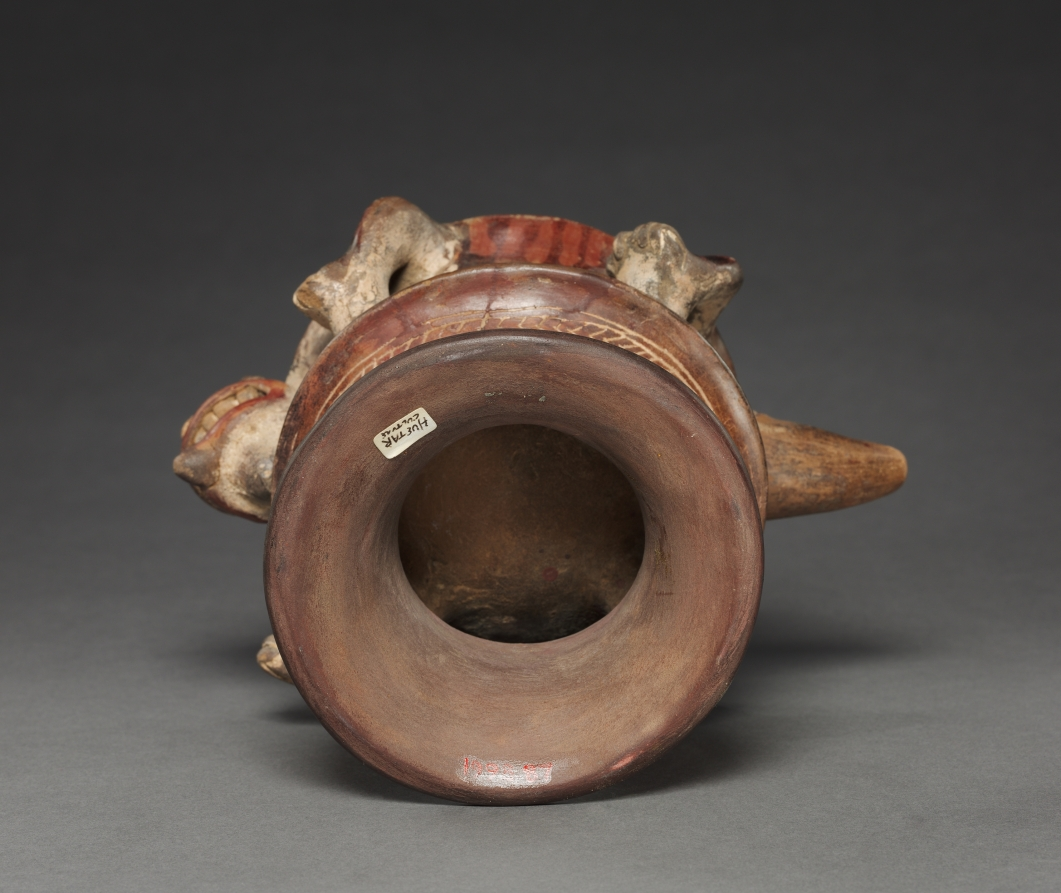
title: Jaguar Bowl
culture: Colombia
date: c. 850–1500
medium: resist-painted earthenware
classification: Ceramic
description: Probably from the southern highland region of Colombia, this unusual vessel has a bowl in the form of a comically fierce jaguar, mounted atop a pedestal base.